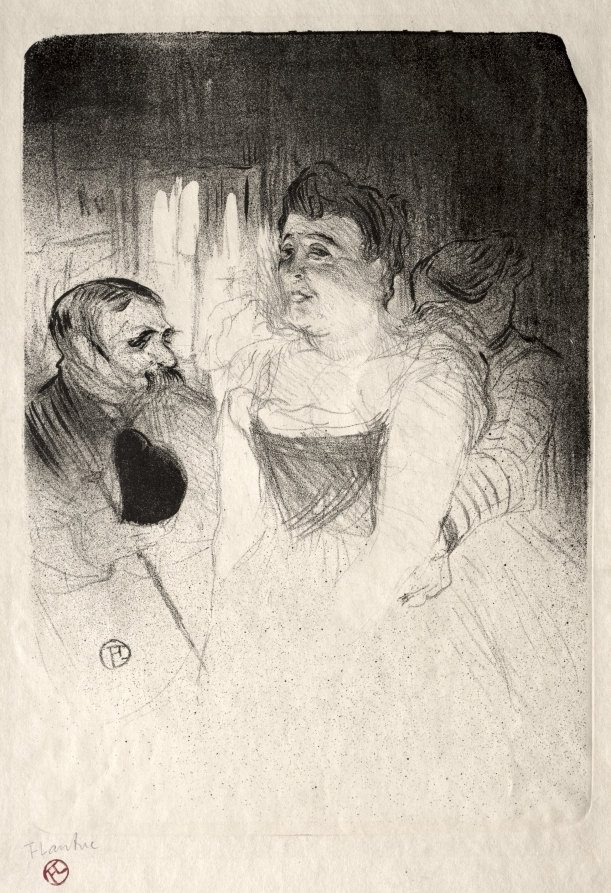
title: Judic in the Loge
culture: France, 19th century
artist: Henri de Toulouse-Lautrec (French, 1864–1901)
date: 1894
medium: lithograph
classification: Print